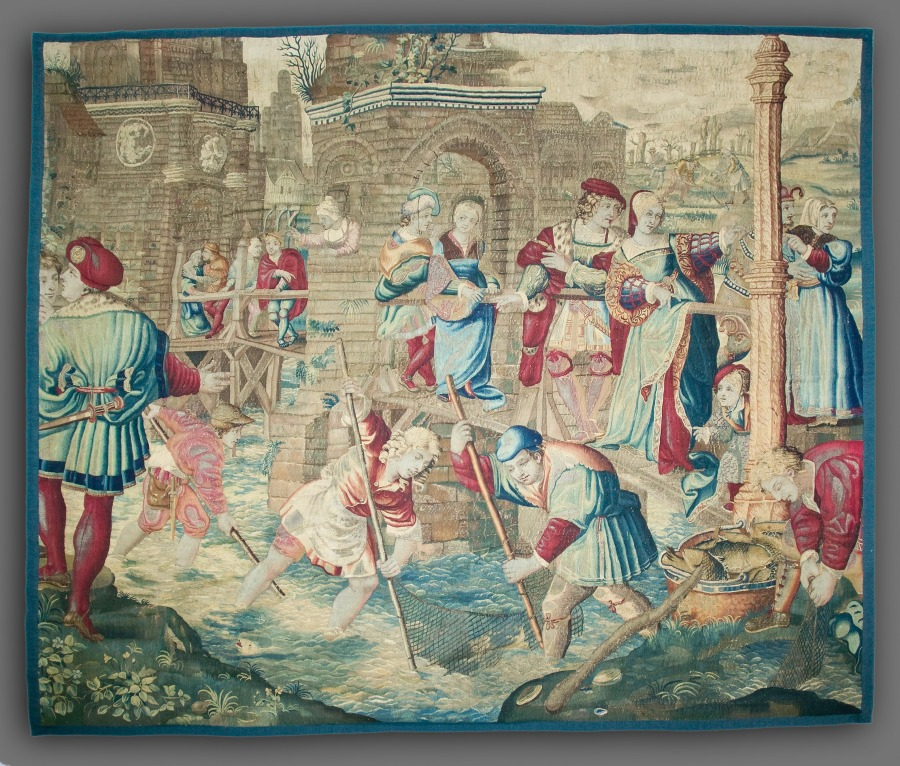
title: Four Seasons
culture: France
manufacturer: possibly by Gobelins Manufactory (France, Paris, est. 1662)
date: designed c. 1535, woven mid- to late 1600s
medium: Wool, silk, and gold filé; tapestry weave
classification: Tapestry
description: Each of these tapestries depict rustic activities appropriate to the season: fishing and gardening for spring, harvesting of grain in summer, wine making for autumn, and ice skating for winter. As tapestries fell out of vogue in the 1700s and 1800s many were burned so their metal threads could be harvested to mint new coins. Before coming to the Cleveland Museum of Art, these tapestries hung in the family home of Frank H. Ginn and Cornelia Root Ginn in Gates Mills, Ohio. Their children donated the tapestries to the museum in 1952.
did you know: At the time of the Four Seasons's production, weavers at the Gobelins Manufactory in Paris were paid on a wage-scale based on the difficulty of the weaving; those who wove heads and flesh tones were paid the most.